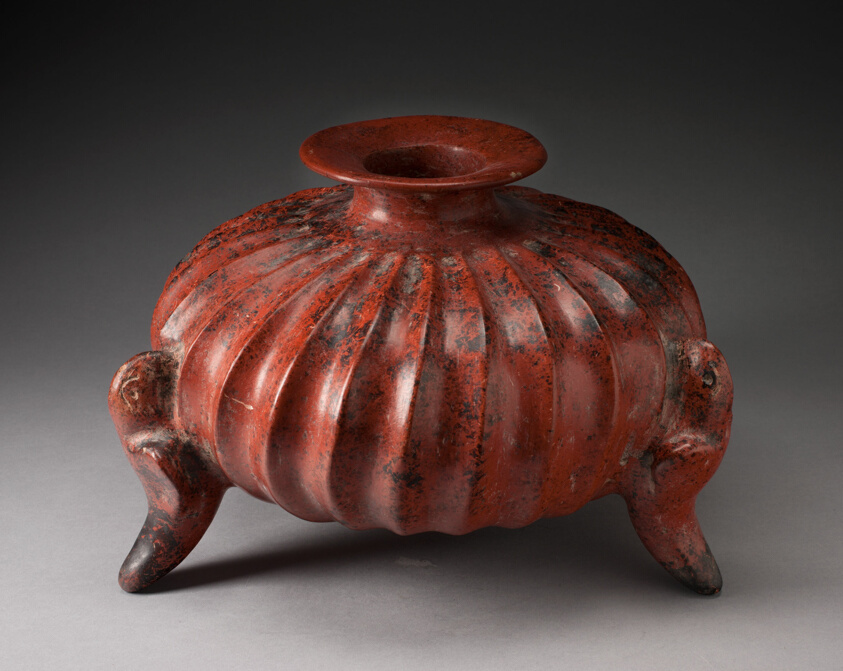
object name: Vessel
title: Vessel in the Form of a Squash with Parrot Supports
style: colima, mesoamerican, Arts of the Americas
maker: Colima (Colima, Mexico)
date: 1–200 CE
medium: Ceramic and pigment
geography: Colima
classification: vessel; art of the americas; ceramics